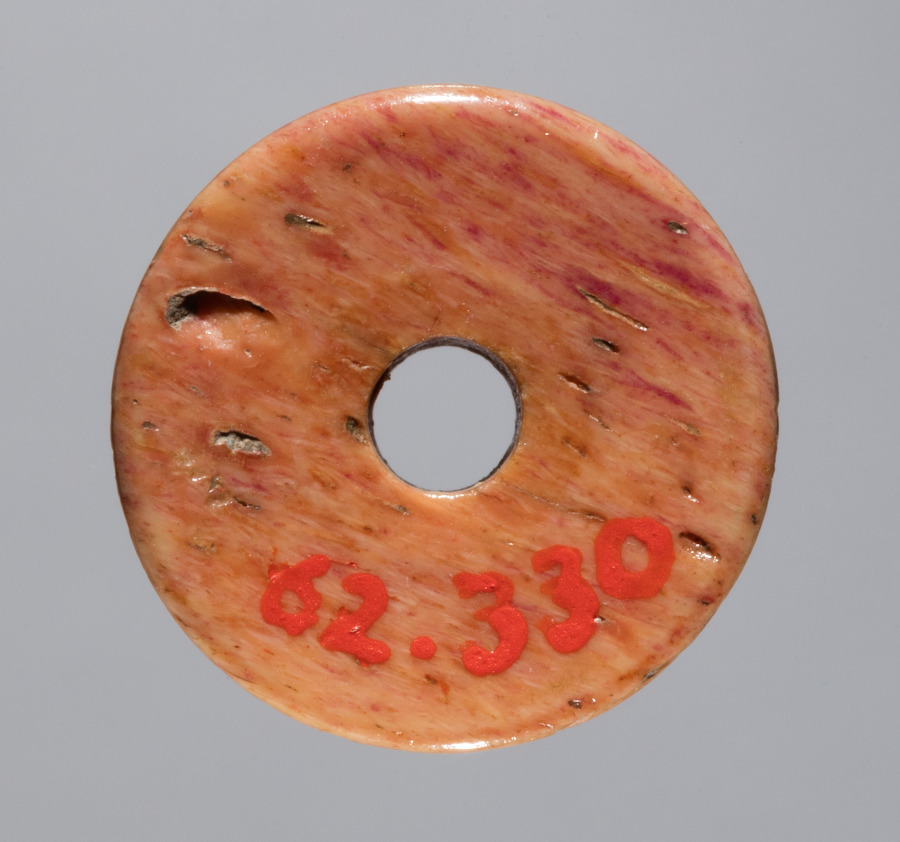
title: Spindle Whorl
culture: Iran, early Islamic period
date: 700s - 900s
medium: bone, incised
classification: Spindle Whorl